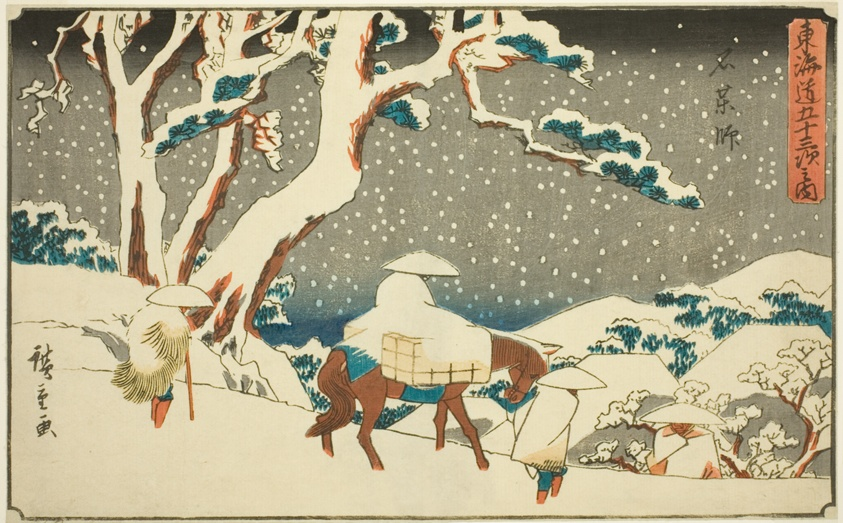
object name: Print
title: Ishiyakushi, from the series "Fifty-three Stations of the Tokaido (Tokaido gojusan tsugi no uchi)," also known as the Gyosho Tokaido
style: Japanese (culture or style)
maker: Utagawa Hiroshige 歌川 広重; Japanese, 1797-1858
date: c. 1841/44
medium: Color woodblock print; aiban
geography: Japan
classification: woodblock print; print; asian art